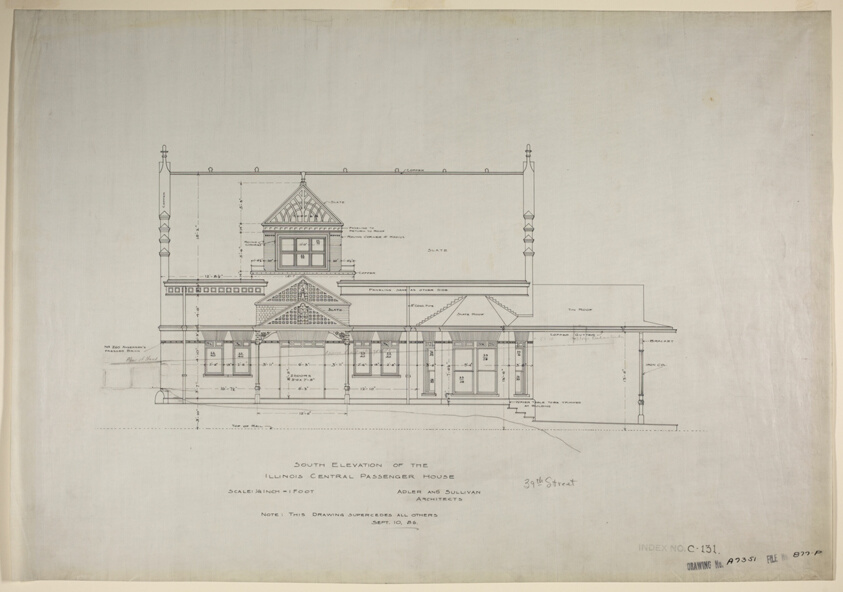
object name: Architectural Drawing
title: Illinois Central Railroad, Oakland Avenue Passenger Station, Chicago, Illinois, South Elevation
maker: Adler and Sullivan; American, 1883-1895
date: 1886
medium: Ink on linen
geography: Chicago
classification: architectural drawing